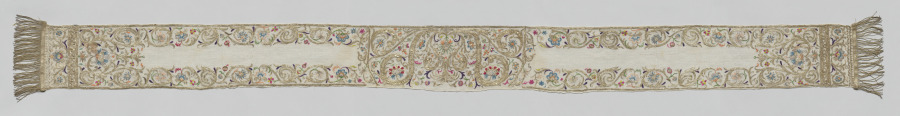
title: Headdress (beniqa)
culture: Africa, North Africa, Algeria, Algerian embroiderer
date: 1800s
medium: Linen, silk, and metal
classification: Embroidery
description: Beniqa were stylish headdresses that women wore when visiting the hammam (steam bath). The linen fabric absorbed the damp from their wet hair. With its gold and silver metal thread, shimmering spangles, and brightly colored threads forming flowers and vines, this beniqa was a ceremonial garment worn for the ritual bath before a Jewish woman’s wedding; it was also part of her dowry. After toweling off her hair, a woman made two braids, which she would then twist into the cap’s fabric and tie on her head, with the gold-fringed ends trailing down.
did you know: Slender gray lines made in pencil or chalk trace out unstitched designs on this elaborate ritual cap.